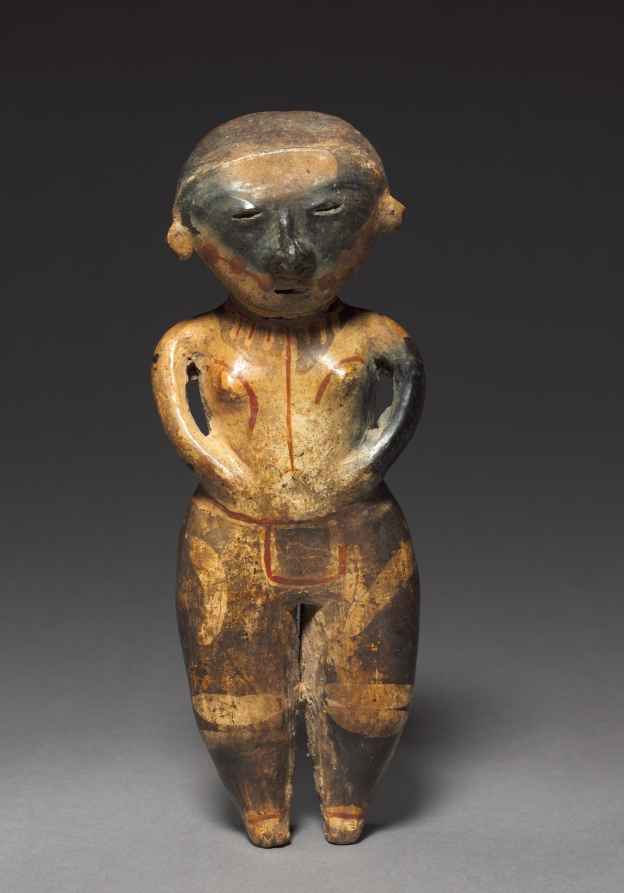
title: Standing Female Figure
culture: Mexico, Nayarit, Chinesco style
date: 100 BCE–300 CE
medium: pottery with colored slips and resist patterning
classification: Sculpture